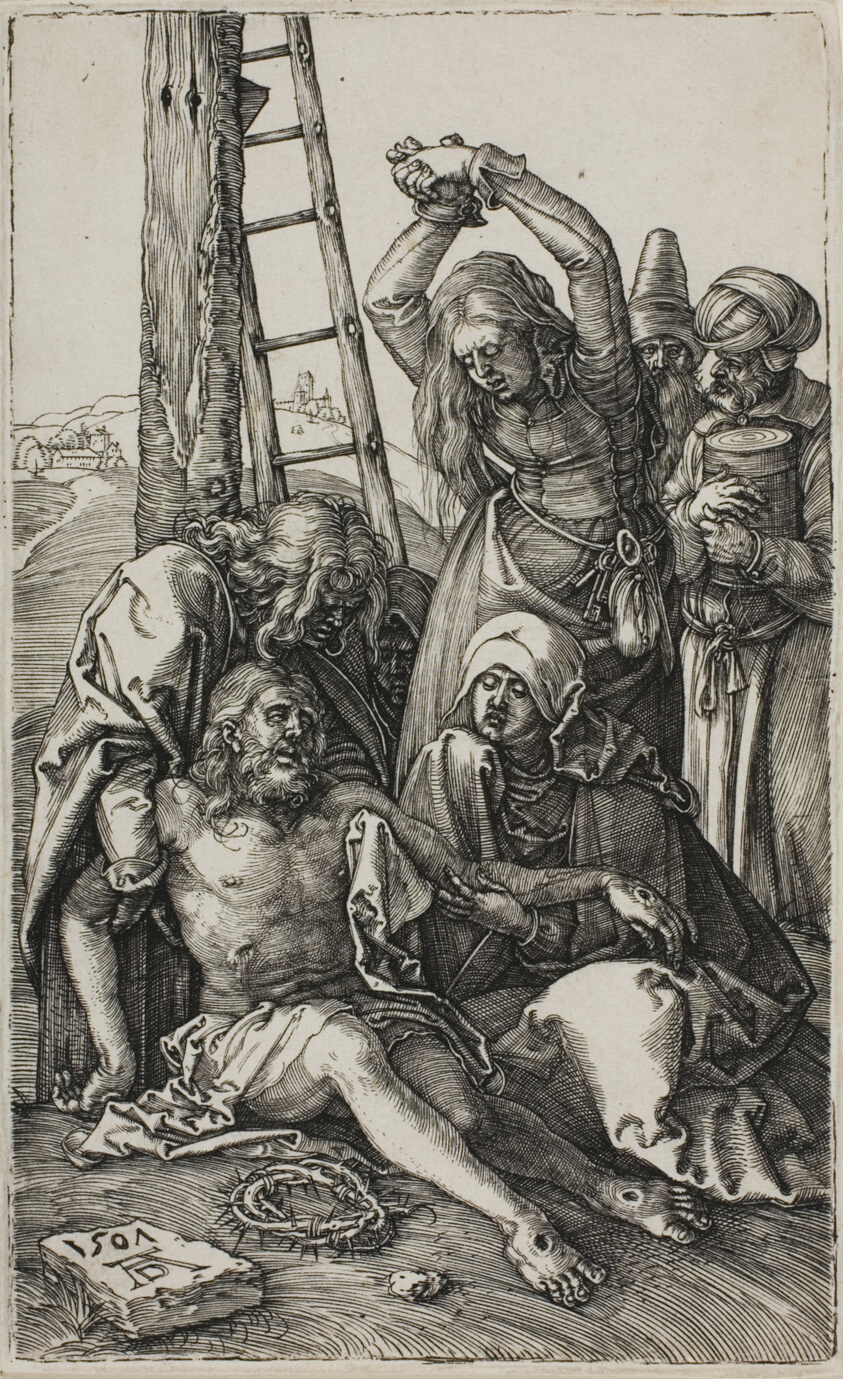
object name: Print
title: Lamentation of Christ, from The Engraved Passion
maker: Albrecht Dürer (German, 1471-1528)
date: 1507, published 1513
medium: Engraving in black on ivory laid paper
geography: Germany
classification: engraving; print; prints and drawing; paper